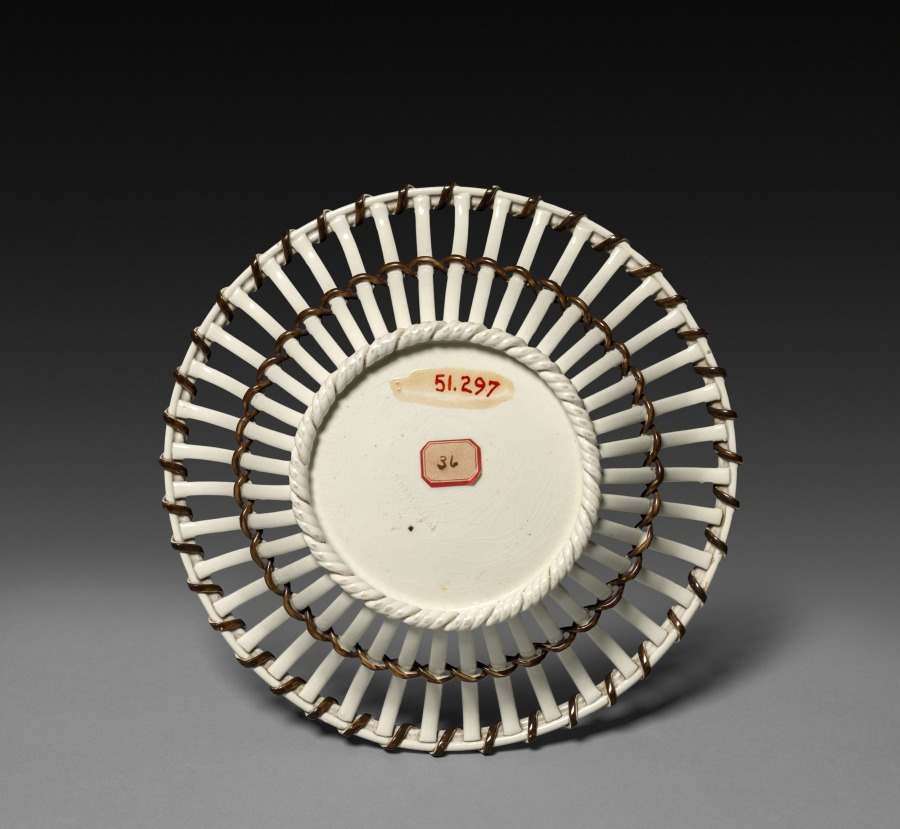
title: Bowl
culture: England, Staffordshire, 18th century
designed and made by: Wedgwood Factory (British)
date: late 1700s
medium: earthenware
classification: Ceramic